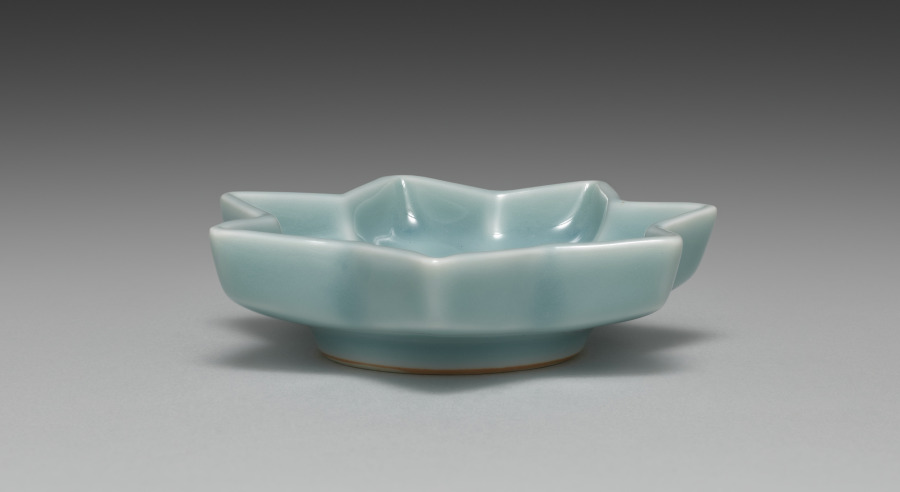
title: Saucer from Maple Leaf-Shaped Saucers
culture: Japan, Meiji period (1868–1912)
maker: Seifū Yohei III (Japanese, 1851–1914)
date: 1893–1914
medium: One of five dishes from a set of ten; porcelain with blue glaze and molded design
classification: Ceramic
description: These maple leaf–shaped saucers, like Yohei III's five shell saucers CMA 2022.188, have a long, horizontal box with a separate compartment for each piece. Now a set of five, these dishes were originally a set of ten, stored in two boxes of five each. From their housings, which accommodate differing numbers of objects, one can hypothesize that while some items created by the Seifu studio were intended to be acquired in larger sets, and thus were perhaps made to order, others, like these, may have been items to be purchased of the shelf in set quantities that allowed clients flexibility in scale. The box for these five saucers describes them as “heavenly blue[–glazed] porcelain” (tenseiji). The veins of the leaves are slightly raised in the clay so that the glaze pools around them and they stand out as white where the glaze thins. There are longer lines at the points of the leaves and shorter ones following the wall of each indentation so that the design has both a horizontal and a subtle vertical dimension.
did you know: These saucers shaped like maple leaves show Seifū Yohei III’s “heavenly blue glaze.”